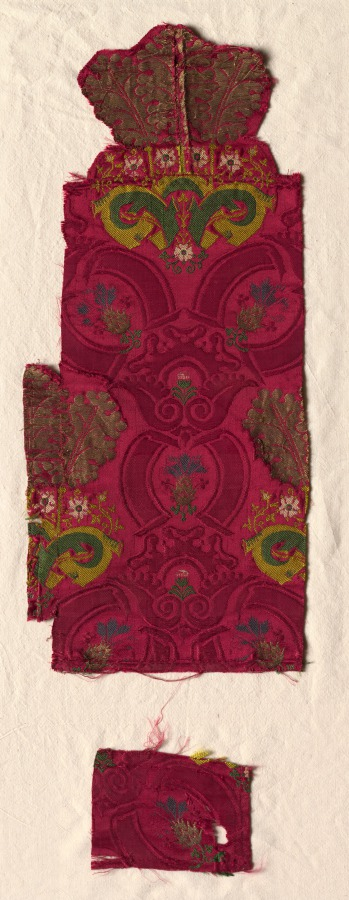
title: Fragments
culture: Spain, second half of 15th century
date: second half of 15th century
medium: brocaded silk with metal thread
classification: Textile